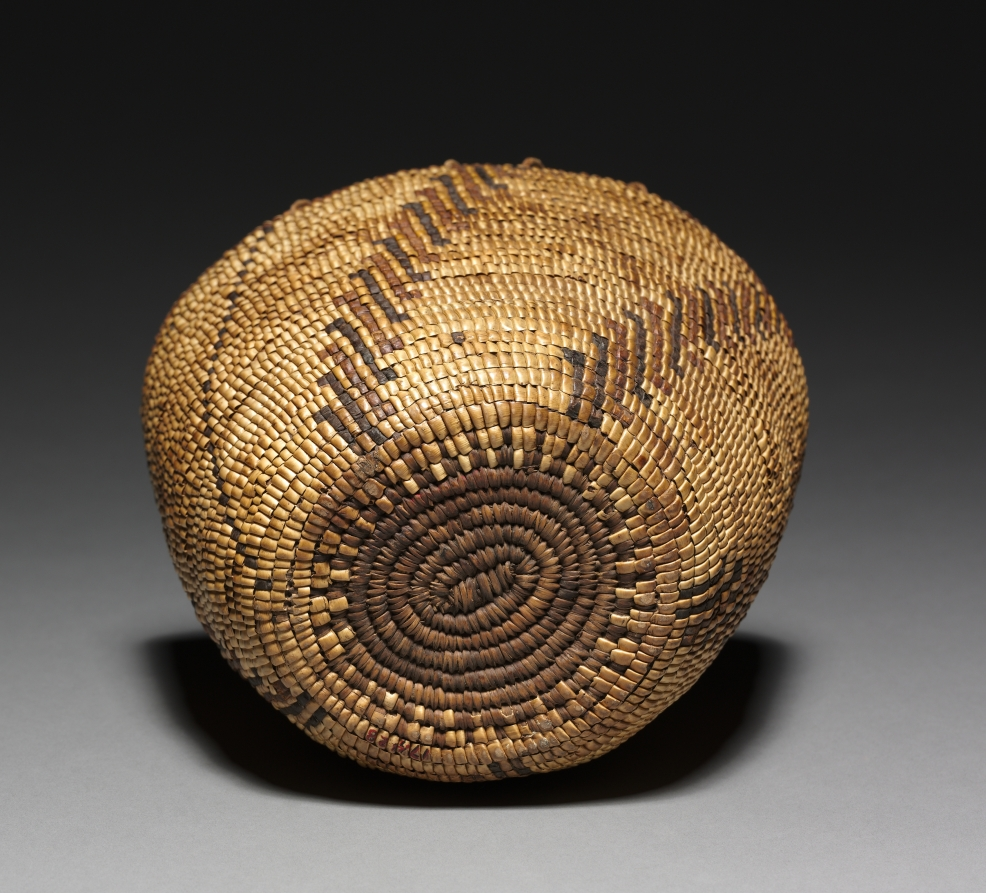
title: Berry Basket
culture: Northwest Coast, coastal, Salish, late 19th century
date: 1890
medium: woven, imbricated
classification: Basketry